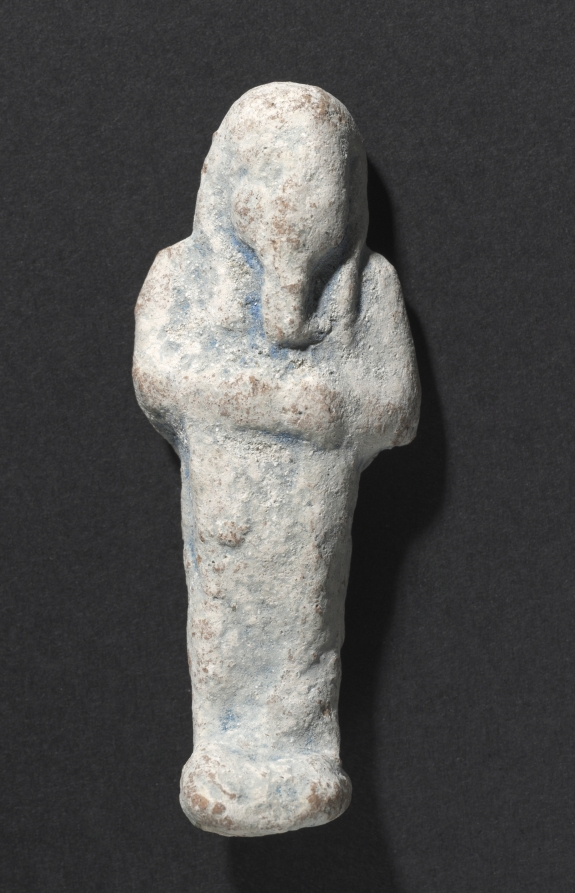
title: Shawabty of Ditamenpaankh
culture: Egypt, Late period (715–332 BCE), Dynasty 25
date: 715–656 BCE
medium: terracotta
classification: Funerary Equipment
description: High demand for shawabtys in the Late Period, a time when as many as 400 or more shawabtys were placed in the tomb with the deceased, gave rise to a specialized container for storing them: the shawabty box. This example is inscribed for the lady of the house, Ditamenpaankh, and was probably one of a pair originally made for her. The single-masted boat on the box's lid is perhaps an allusion to the pilgrimage of the deceased to the holy city of Abydos, the cult city of Osiris, king of the dead. The shawabtys inside are crude, mass-produced examples cast in an open mold. Made of terracotta, their blue paint imitates more costly shawabtys made of faience. As for the shawabty spell, it has been removed from its traditional location on the shawabty's front and relocated onto the sides of box, where it needed only to be written once, thus expediting production.